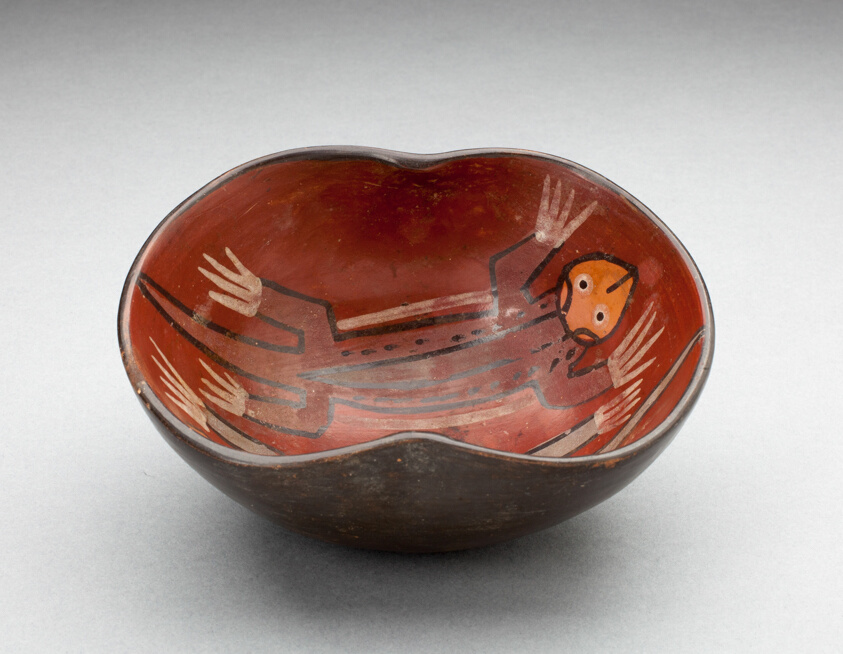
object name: Vessel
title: Small Inset Side Bowl Depicting a Pair of Lizards in the Interior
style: nazca, early intermediate period, Pre-Columbian, americas, Arts of the Americas, andean, andes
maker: Nazca; South coast, Peru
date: 180 BCE–500 CE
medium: Ceramic and pigment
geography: Nazca Valley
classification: bowl; earthenware; art of the americas; ceramics; vessel